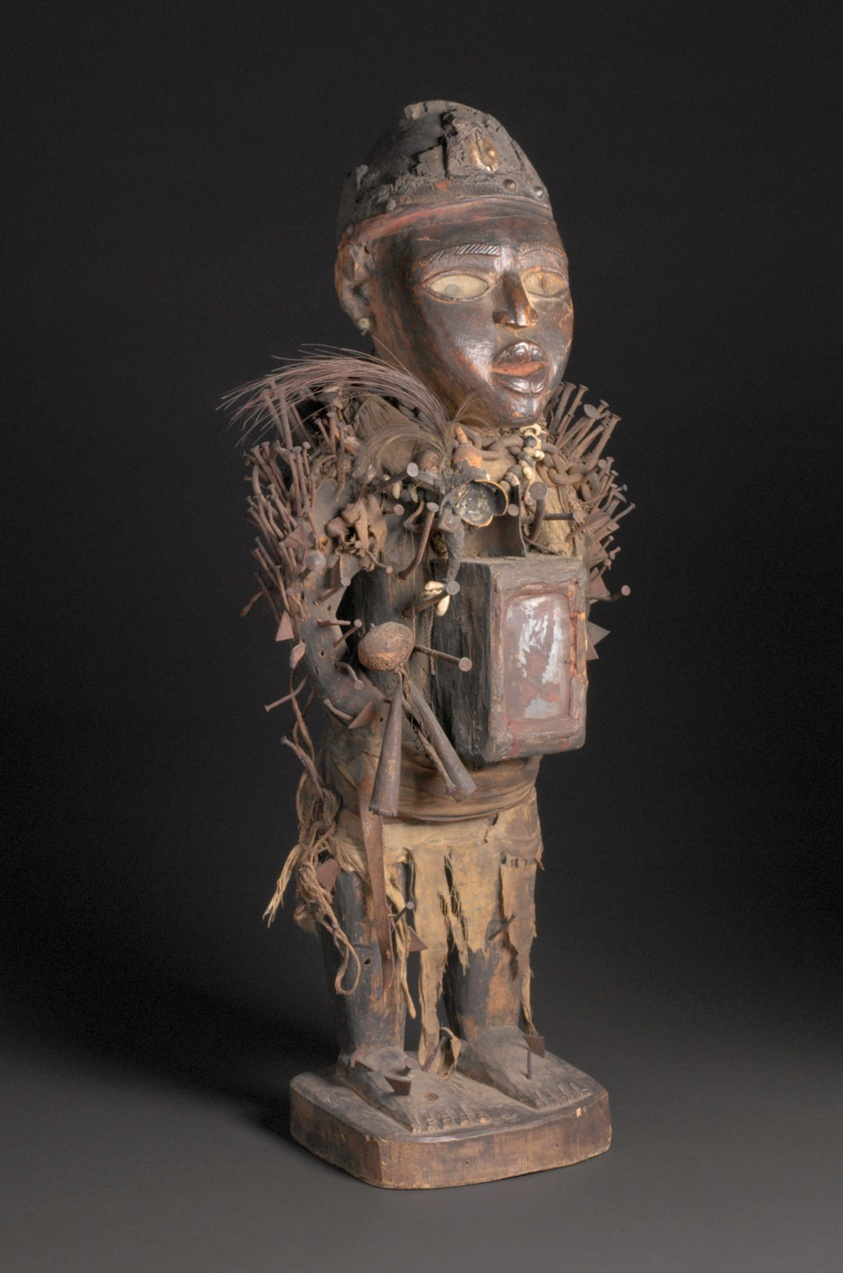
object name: Sculpture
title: Male Figure (Nkisi Nkondi)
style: vili, Arts of Africa, african Art, Central Africa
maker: Kongo: Vili; Republic of the Congo; Central Africa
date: Probably early to mid-19th century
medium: Wood, metal, glass, fabric, fiber, cowrie shells, bone, leather, gourd, and feathers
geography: Republic of the Congo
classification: sculpture; wood; arts of Africa; medicine object; african art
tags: ritual objects, religion, contracts, medicine, sacred, supernatural